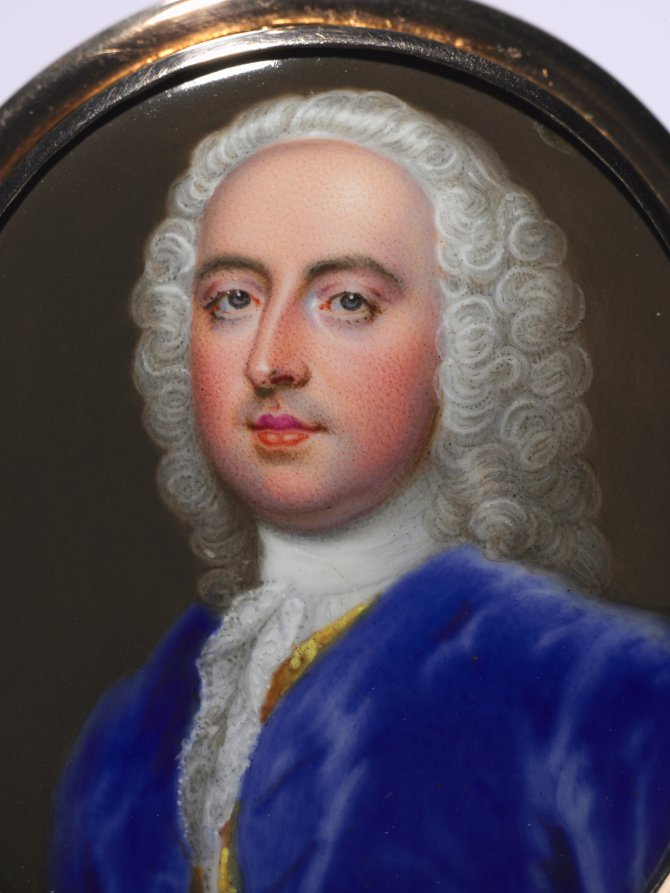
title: Portrait of a Man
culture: England, 18th century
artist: Christian Friedrich Zincke (German, 1683/85–1767)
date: c. 1735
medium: enamel on copper in a gold frame with a blue glass and hair reverse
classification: Portrait Miniature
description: The unknown sitter's shoulders are turned to the right, and he is painted almost full face. He wears a bright blue velvet coat with covered buttons, deep yellow embroidered waistcoat, and white stock collar with double lace frill down the front. His powdered wig falls to his shoulders. He has gray eyes and is clean shaven with rosy cheeks, and the background is dark brown. The miniature is set in a gold locket-style frame. The back displays a lock of dark brown hair inside a border of bright blue foiled glass—a popular framing style for miniatures in the late eighteenth and early nineteenth centuries and, therefore, surely a later addition. Since the publication of the Greene collection catalogue in 1951, the attribution of this miniature has been disputed, with experts alternately suggesting Christian Friedrich Zincke and possibly Charles Boit (1663–1727). The evidence in favor of Zincke, however, is far stronger than it is for Boit, who had not worked in England for over a decade before his death in 1727, several years before the most plausible date for this portrait. Among Zincke’s hallmarks are lips painted two different colors—here, purplish pink on top and orange on the bottom—a practice that became increasingly pronounced later in his career. This portrait also exhibits Zincke’s characteristic treatment of the eyes during this period: he framed the eyes with individually painted black dots to represent eyelashes. The counter-enamel is not inscribed but has the smooth appearance of the counter-enamels customarily associated with Zincke’s later career. A miniature identical in all but the facial features appeared at Christie’s, London, in 2004. Zincke often used this costume consisting of a blue (or sometimes brown) velvet jacket with covered buttons, yellow embroidered waistcoat, and frilled lace cravat. An example that sold at Christie’s in 1996 is signed and dated 1734. Another closely related and unsigned example by Zincke in the Metropolitan Museum of Art has been dated to c. 1745, indicating when this attire was frequently employed by Zincke’s studio.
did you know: Unlike fragile portrait miniatures painted in watercolor on vellum or ivory, which are prone to cracking, fading, and flaking, enamels are resilient, impervious to the effects of light, and retain their striking original colors over time.